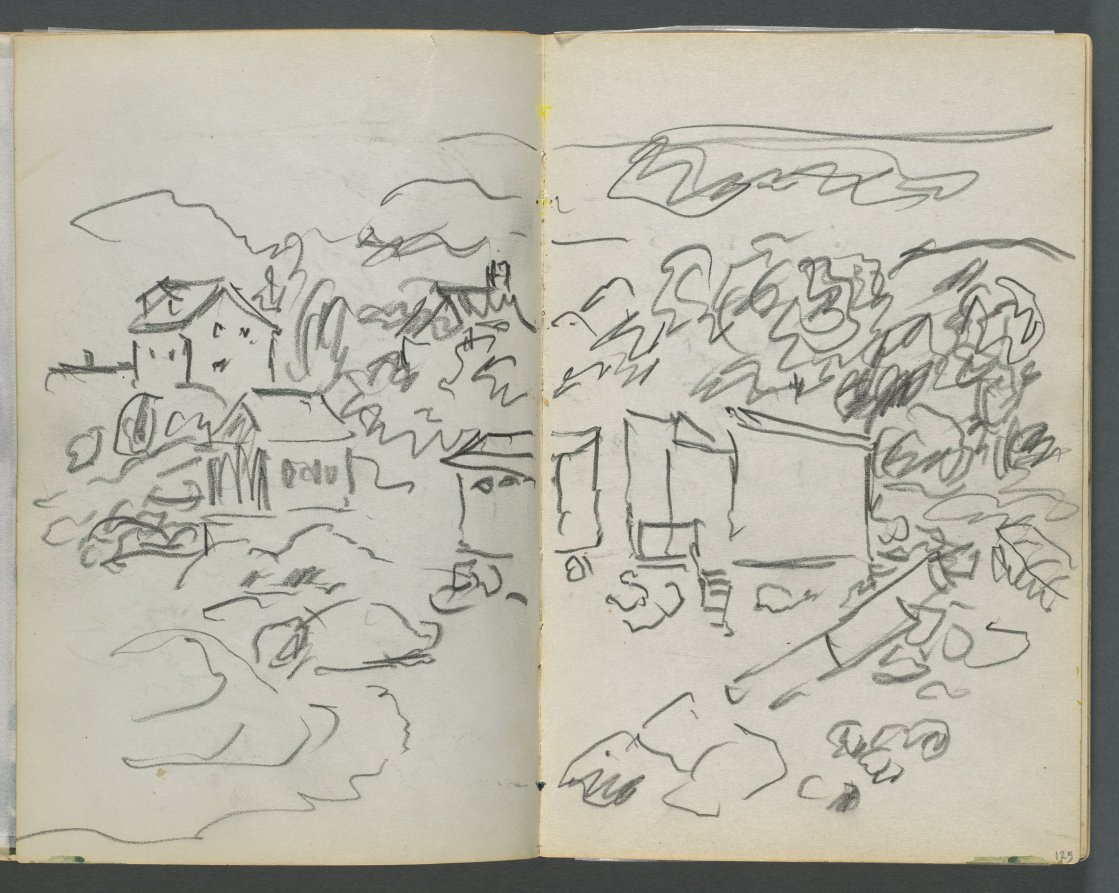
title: Sketchbook, The Dells, N° 127, page 124 & 125: Landscape with Houses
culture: America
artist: Maurice Prendergast (American, born Newfoundland [now Canada], 1858–1924)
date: c. 1919–1921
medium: graphite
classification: Bound Volume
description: This sketchbook contains 59 pages of graphite drawings and 16 watercolors made at various locations on Cape Ann, Massachusetts.